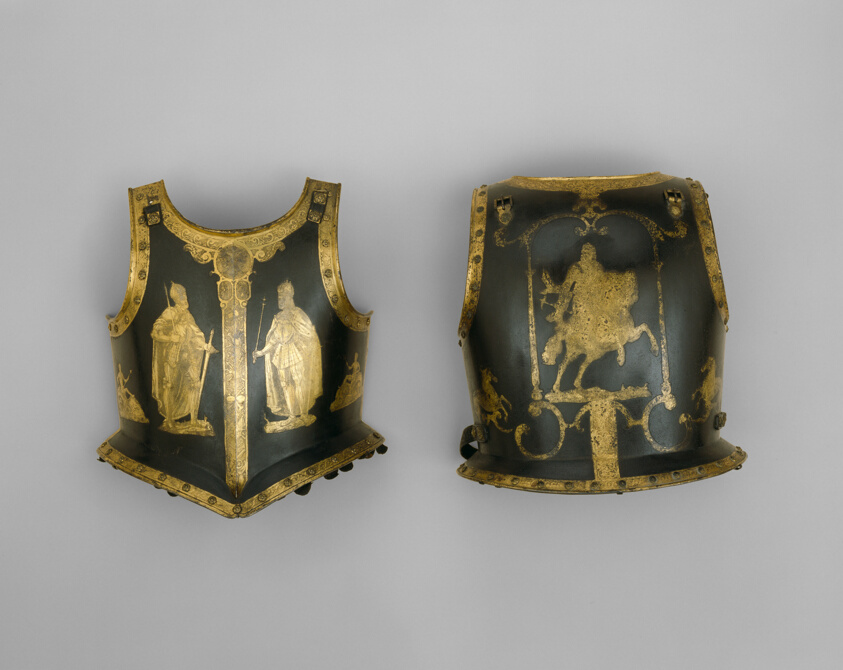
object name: Armor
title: Zischägge (Helmet) and Cuirass of Emperor Ferdinand II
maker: South German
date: c. 1620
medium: steel, gilding, brass, and leather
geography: Southern Germany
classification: suit-element; armor; arms and armor